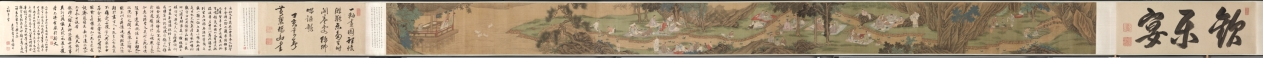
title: Purification at the Orchid Pavilion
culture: China, Qing dynasty (1644-1911)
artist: Fan Yi (Chinese, c. 1615–before 1688)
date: 1671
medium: Handscroll; ink and color on silk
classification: Painting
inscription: Artist's inscription, signature, and 2 seals: Painted by Fan Yi of Zhongfu during the second month of winter of the xinhai year [1671]. [2 seals] Fan Yi zhi yin, Zi yu yi.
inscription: Title on the frontispiece by Monk Yueshan (1629-1709).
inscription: 3 colophons and 13 additional seals: 1 colophon, dated 1707, and 6 seals of Yueshan; 2 colophons and 3 seals of Wong Kwan-Shut (Huang Junshi) 黃君實 (b. 1934); 2 seals of Fu Shen 傅 申 (b. 1937); 2 seals of Tessai Tomioka 富岡鐵齋 (1836-1924).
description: By the 1600s, the historic gathering at Lanting, Zhejiang province, in 353 CE was a common theme in Chinese painting. Originally based on a composition attributed to Li Gonglin (1049– 1106), now lost, Wu school artists revived the theme. Fan Yi, the brother of the artist Fan Qi from Nanjing, used delicate brushwork and luminous colors to depict the spring gathering.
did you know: The gathering’s host is in the Orchid Pavilion at the end of the scroll, representing an episode known as “Wang Xizhi Watching the Geese 王羲之觀鵝圖.”